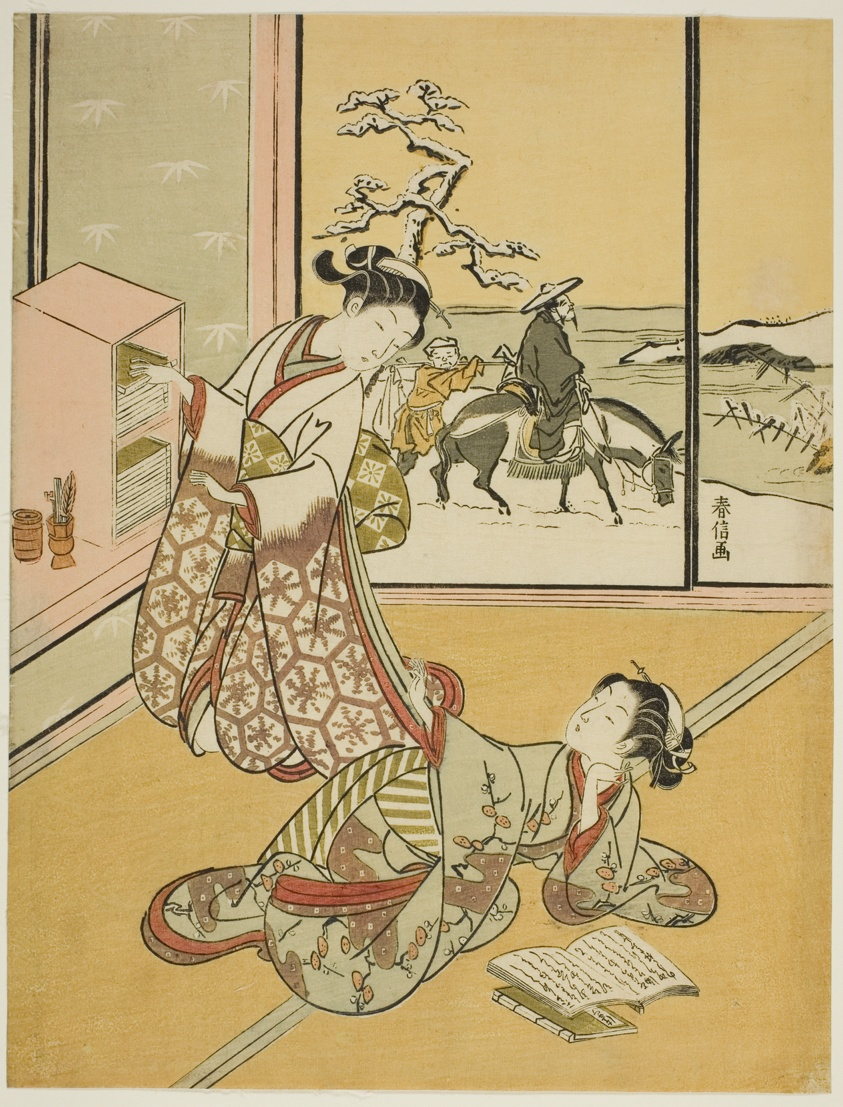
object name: Print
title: Two Young Women Reading Books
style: Japanese (culture or style)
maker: Suzuki Harunobu 鈴木 春信; Japanese, 1725 (?)-1770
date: c. 1767/68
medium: Color woodblock print; chuban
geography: Japan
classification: woodblock print; print; asian art